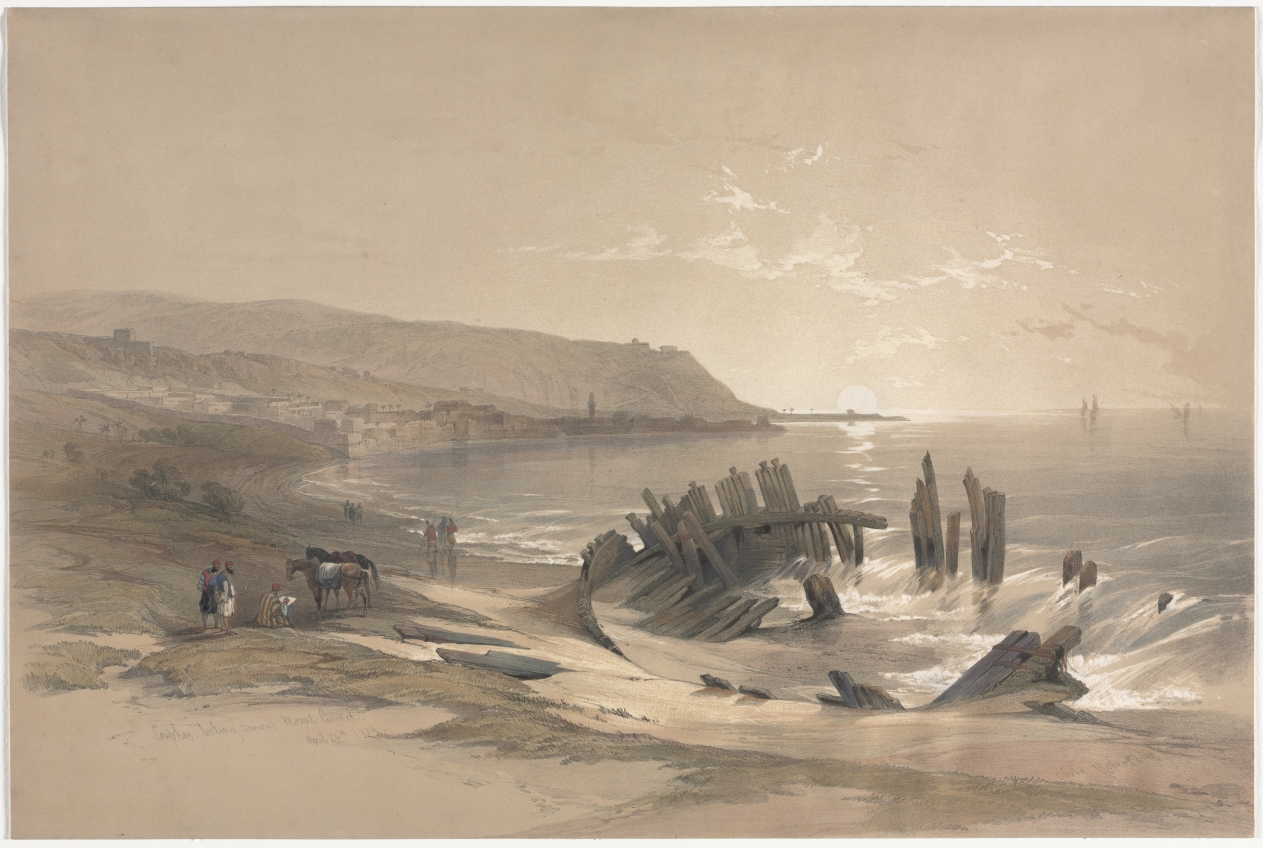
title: Caiaphas Looking Towards Mount Carmel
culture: England, 19th century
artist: David Roberts (Scottish, 1796–1864)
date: 1839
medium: color lithograph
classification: Print